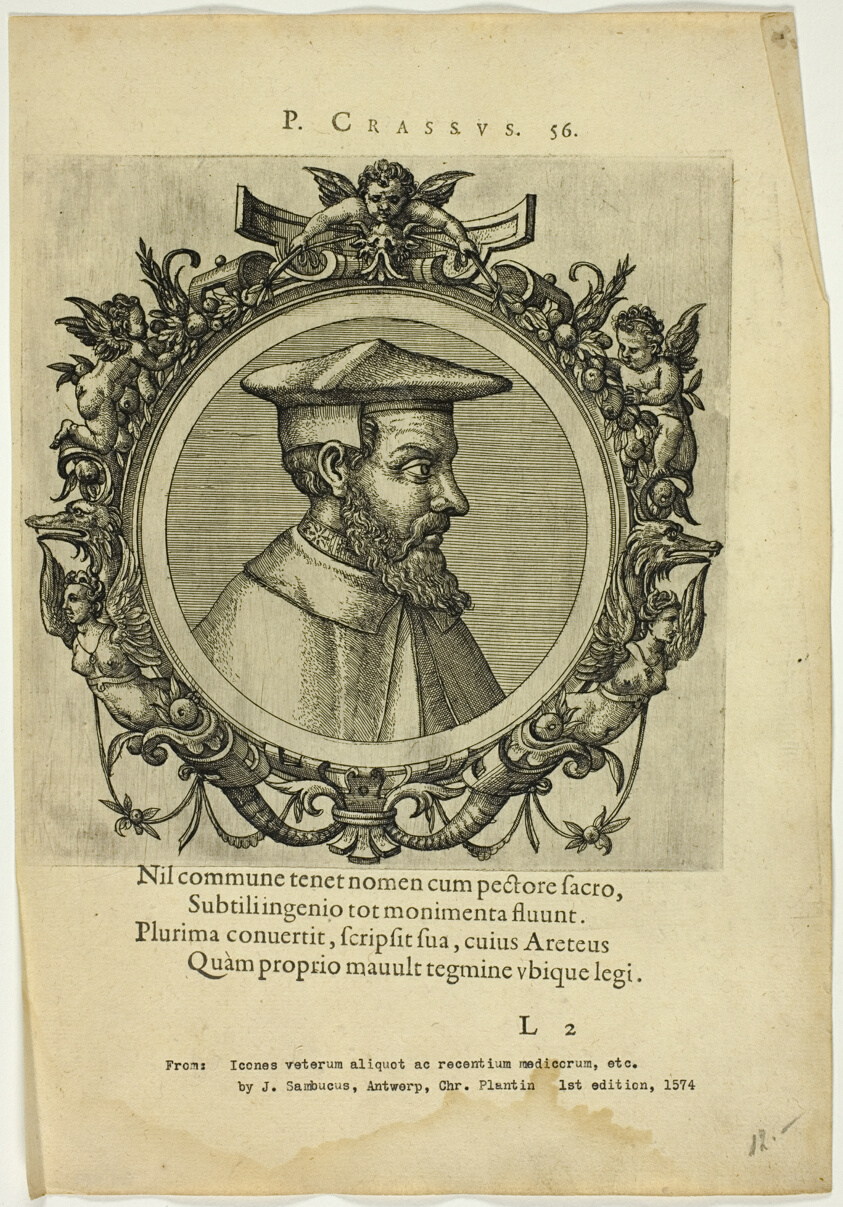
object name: Print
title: Portrait of P. Crassus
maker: Unknown Artist (Flemish); written by Johannes Sambucus (Flemish, 1531-1584)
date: published 1574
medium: Etching, with engraving, on cream laid paper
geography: Flanders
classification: etching; print; prints and drawing